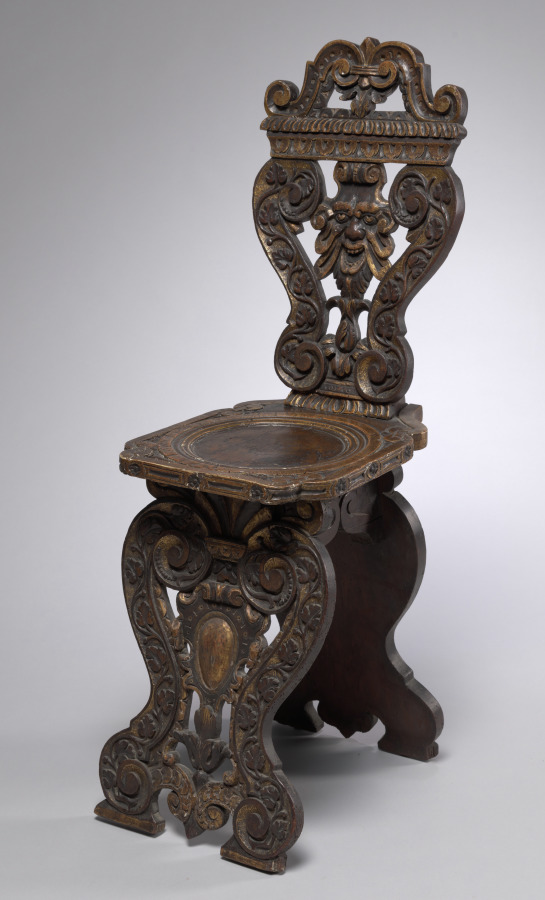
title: Chair, Sgabello type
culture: Italy, late 16th century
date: late 1500s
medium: walnut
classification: Furniture and woodwork